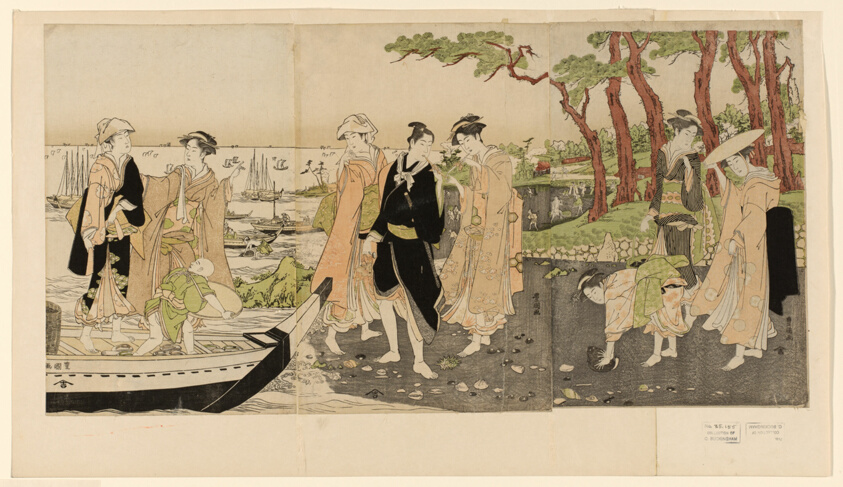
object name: Print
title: Gathering shell fish at low tide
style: Japanese (culture or style)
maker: Utagawa Toyokuni I 初代 歌川 豊国; Japanese, 1769–1825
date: c. 1789/1801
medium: Color woodblock print; oban triptych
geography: Japan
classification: woodblock print; print; asian art